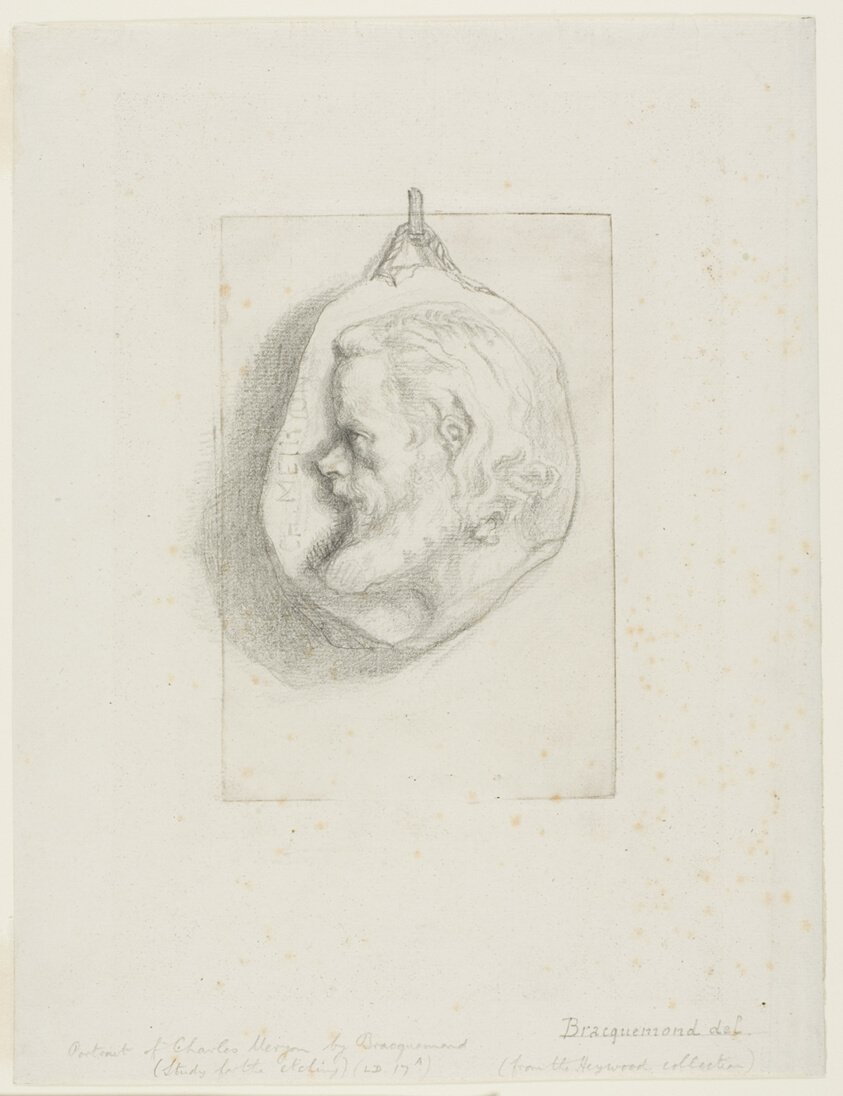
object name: Drawing and Watercolor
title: Profile Portrait of Charles Meryon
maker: Felix Bracquemond; French, 1833–1914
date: 1854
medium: Drawing in graphite on ivory laid paper over plate mark stamped in paper with no etched image but with warm brown ink at plate mark and larger rectangle of lavender ink tone from a stone (?) on ivory laid paper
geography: France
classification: graphite; drawings (visual works); prints and drawing